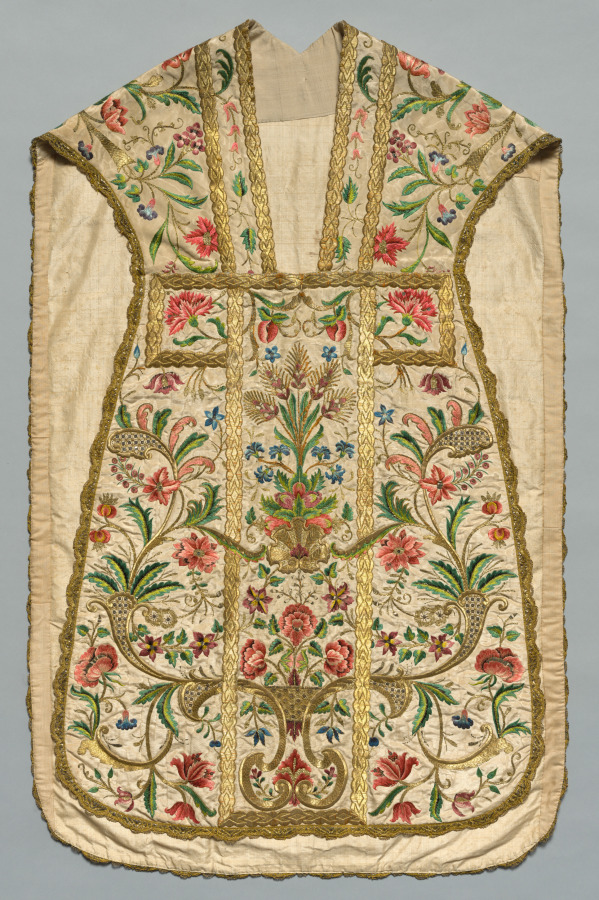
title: Chasuble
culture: Italy, 18th century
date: 1700s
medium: Silk and metallic threads; embroidery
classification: Textile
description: A beautiful design emanates from a vase in the center of this chasuble, displaying symmetrical flora that extend across embroidered gold braids into graceful curvilinear cartouches, reflecting contemporary architectural decoration. Also in the center, sheaves of wheat and grapes represent the bread and wine of the Mass. Gold sequins within thread-outlined squares illustrate fine quality workmanship. The decoration of the stole and chalice veil is similar to the chasuble, also on moiré (watered) silk fabric. The stole, an insignia of the office of deacons and priests, is worn under a chasuble, and the chalice veil—bearing the monogram of Jesus Christ, ihs, in the center—covers the chalice and paten (the plate holding the Eucharistic bread).